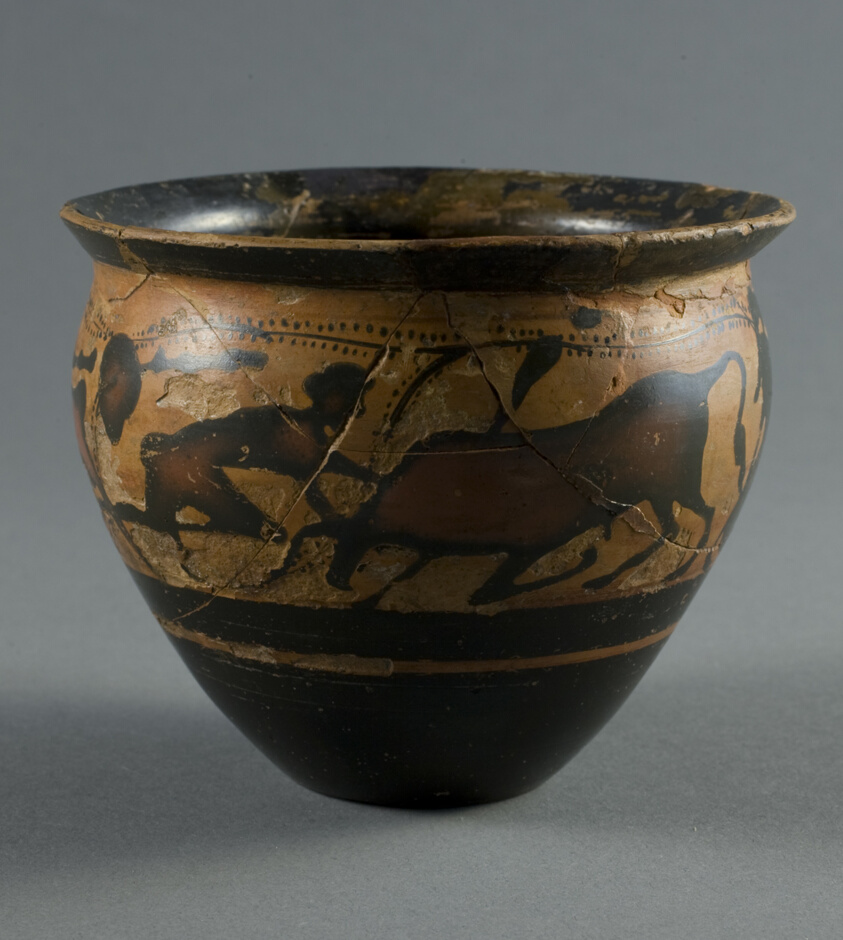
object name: Vessel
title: Mastoid (Drinking Cup)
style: black-figure, attic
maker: Attributed to the Manner of the Haimon Painter; Greek; Athens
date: 500-480 BCE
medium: terracotta, black-figure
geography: Athens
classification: drinking vessel; ceramics; vessel; ancient art